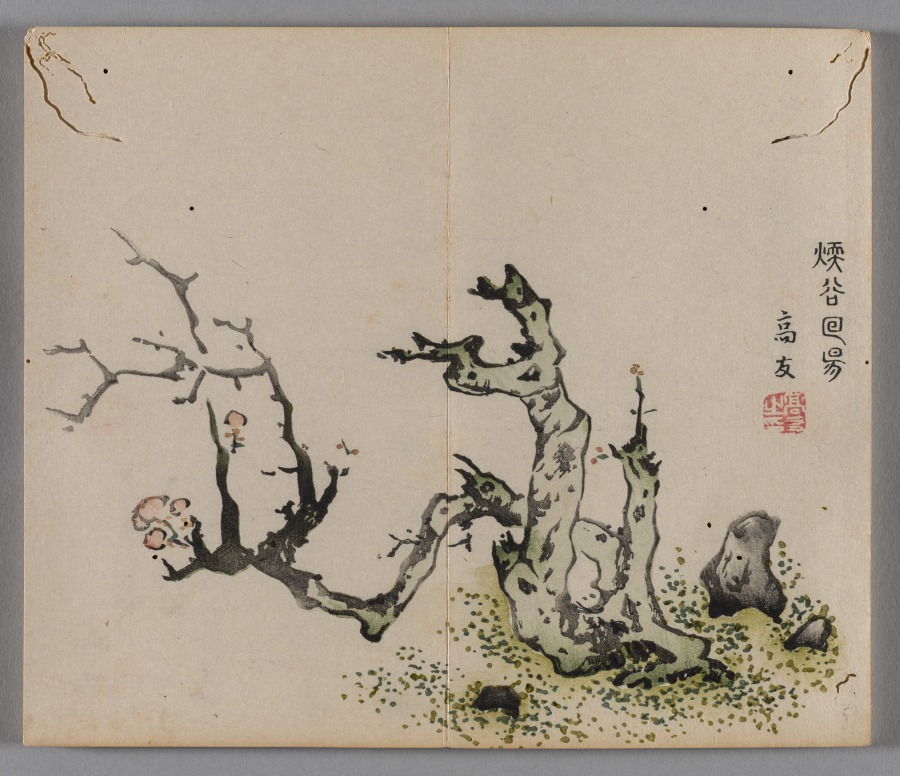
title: Ten Bamboo Studio Painting and Calligraphy Handbook (Shizhuzhai shuhua pu): Plum Blossoms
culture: China, Qing dynasty (1644-1911)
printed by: Hu Zhengyan (Chinese, c. 1584–1674)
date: 1633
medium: Woodblock-printed book; ink and colors on paper; first edition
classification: Print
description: Color printing reached a level of perfection in the early 1600s, as seen in this Ten Bamboo Studio Collection of Calligraphy and Painting and the Mustard Seed Garden Manual of Painting (printed 1679 and 1701). The painterly quality, precision in registering (aligning) the woodblocks, and harmonious colors made them the most successful color print editions in Chinese history. Both editions were printed and compiled in Nanjing, spread nationwide, and had a great impact on the arts in Japan and Korea.